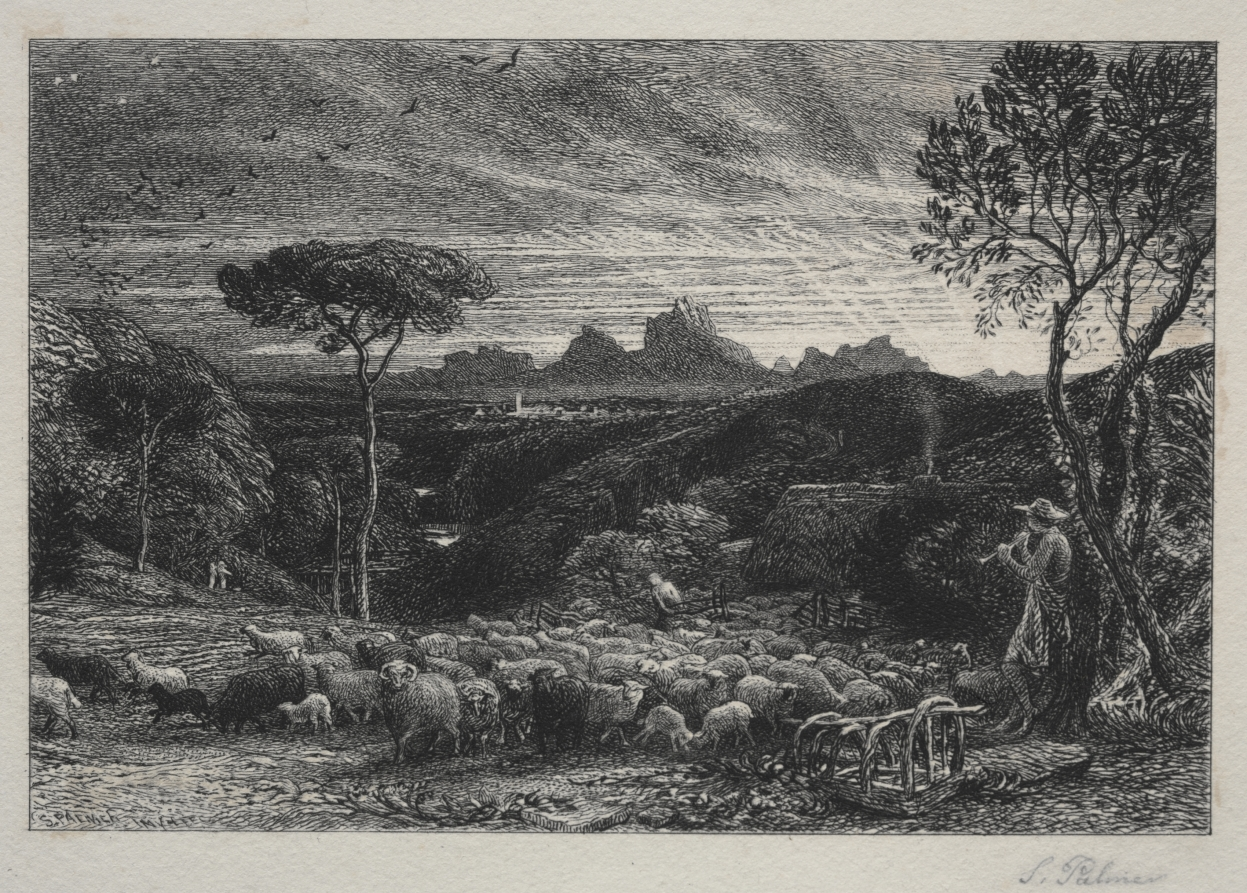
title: Opening the Fold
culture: England, 19th century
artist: Samuel Palmer (British, 1805–1881)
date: 1880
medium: etching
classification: Print